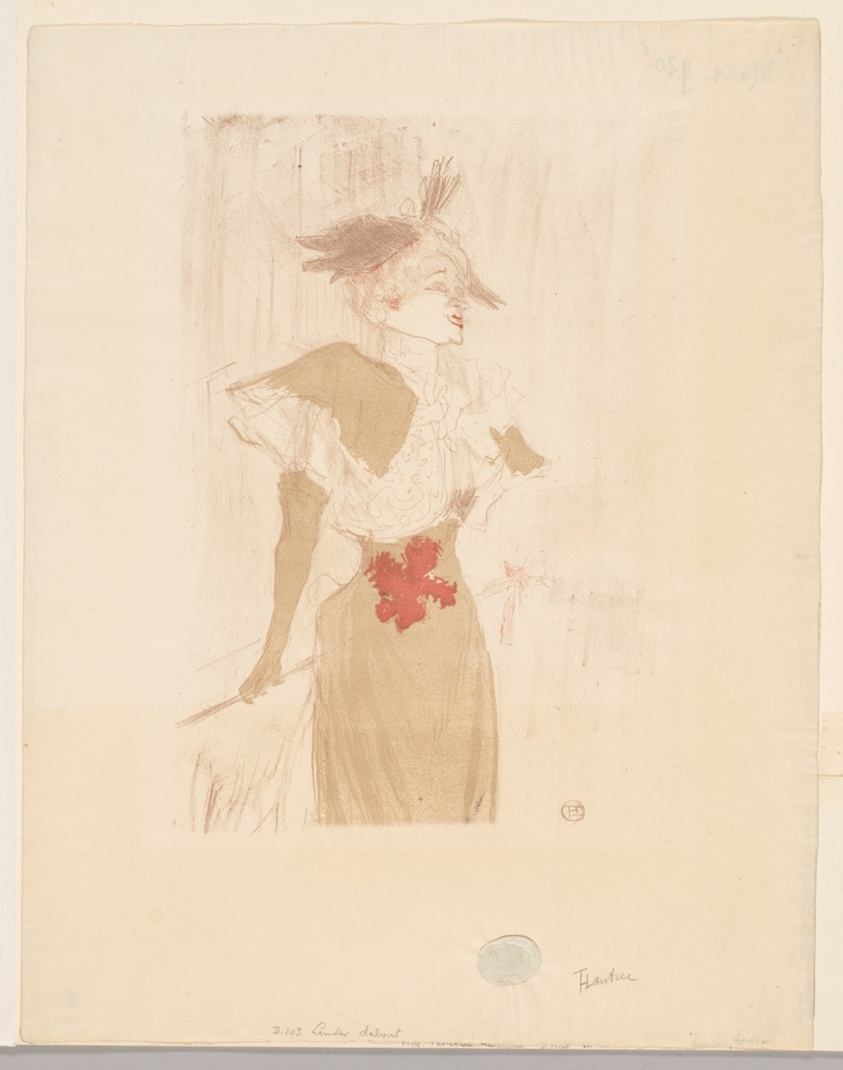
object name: Print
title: Mademoiselle Marcelle Lender, Standing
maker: Henri de Toulouse-Lautrec (French, 1864-1901)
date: 1895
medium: Color lithograph on cream wove paper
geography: France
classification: lithograph; print; prints and drawing